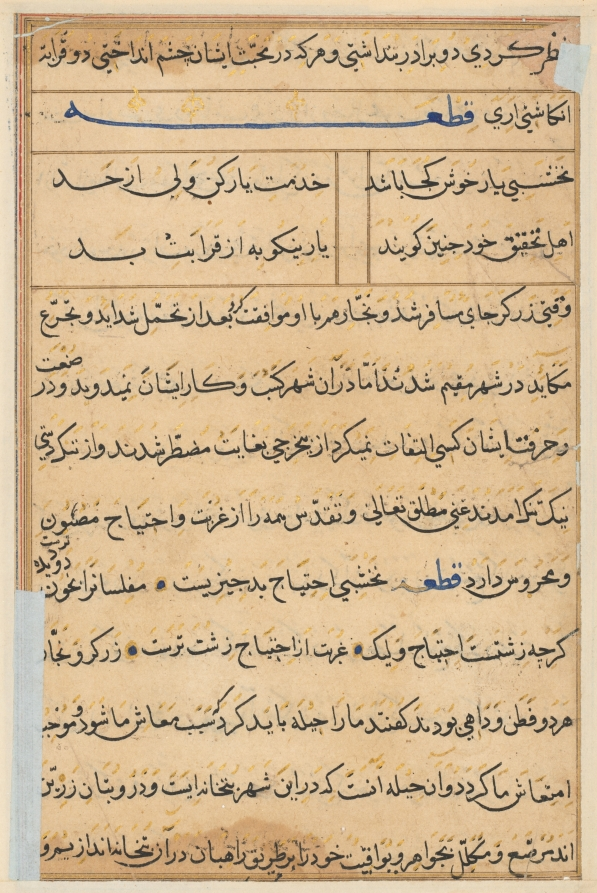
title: Page from Tales of a Parrot (Tuti-nama): text page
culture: Mughal India, court of Akbar (reigned 1556–1605)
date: c. 1560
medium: gum tempera, ink, and gold on paper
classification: Painting